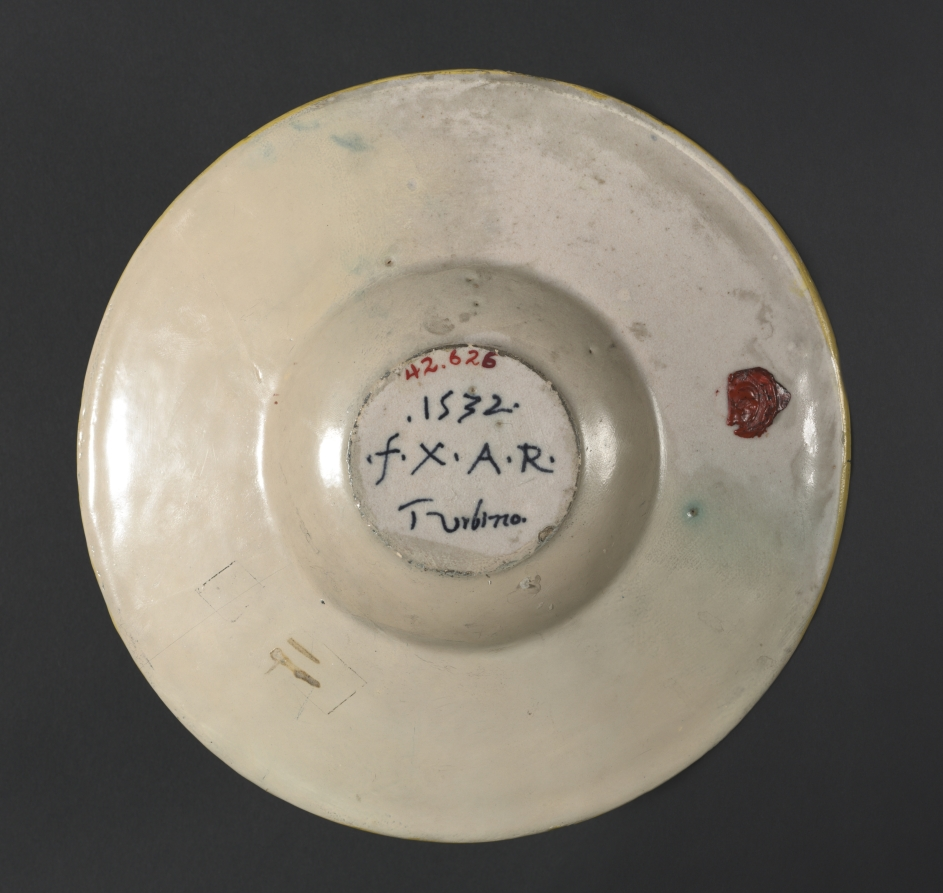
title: Plate with the Arms of the Pucci Family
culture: Italy, Urbino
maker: Francesco Xanto Avelli (Italian, 1487?–1544?)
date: 1532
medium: tin-glazed earthenware (maiolica)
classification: Ceramic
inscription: inscription: F(rancesco) X(anto) A(velli) (da) R(ovigo)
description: Italian nobles of the 1500s often expressed their wealth, social status, and sophistication by ordering large sets of maiolica that sometimes carried their coats of arms or even likenesses, usually in profile as in portraits of the period. The Pucci family was a powerful noble household in Renaissance Florence who were at times quite close allies of the Medici, a prominent banking family.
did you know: A more contemporary head of the family, Emilio Pucci, became famous as a fashion designer in the 1960s and 1970s.